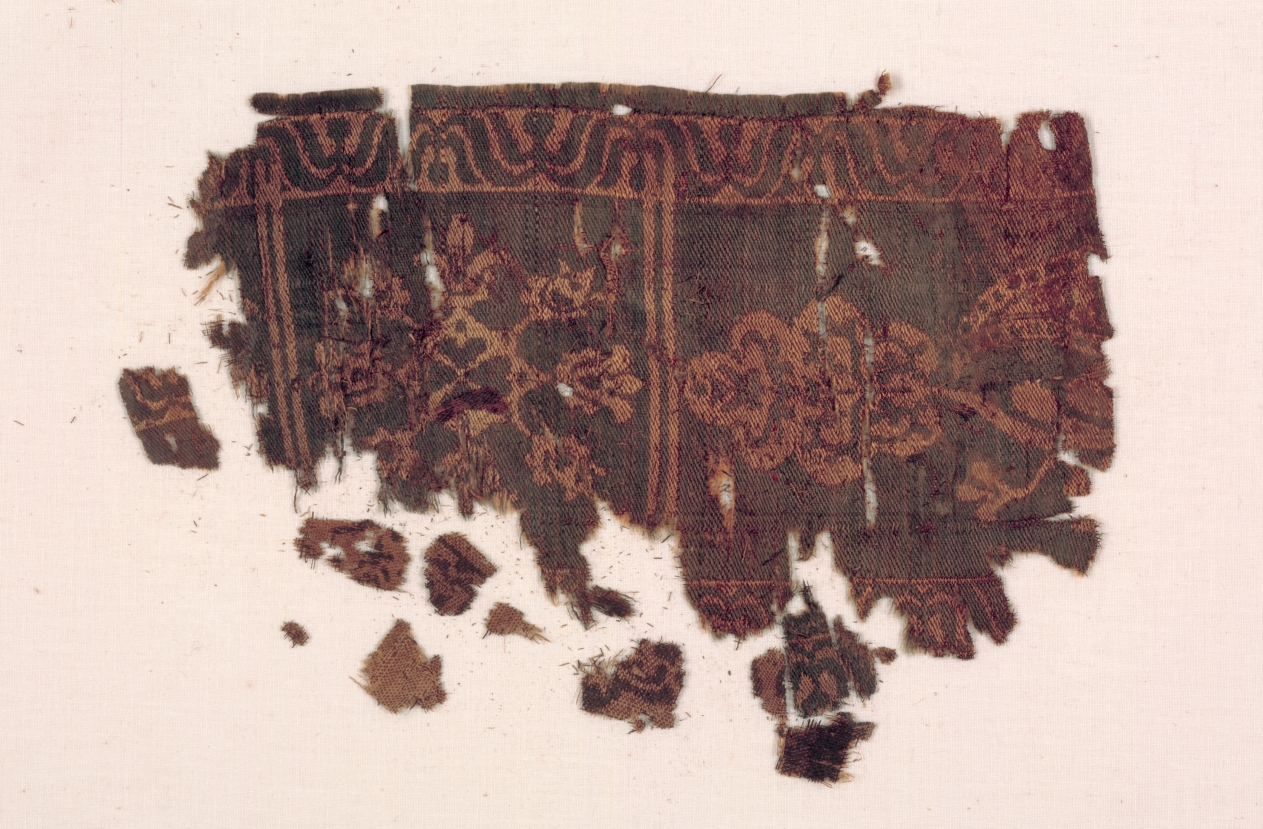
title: Fragment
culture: Egypt or Syria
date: 400s–1100s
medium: silk: compound twill weave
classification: Textile